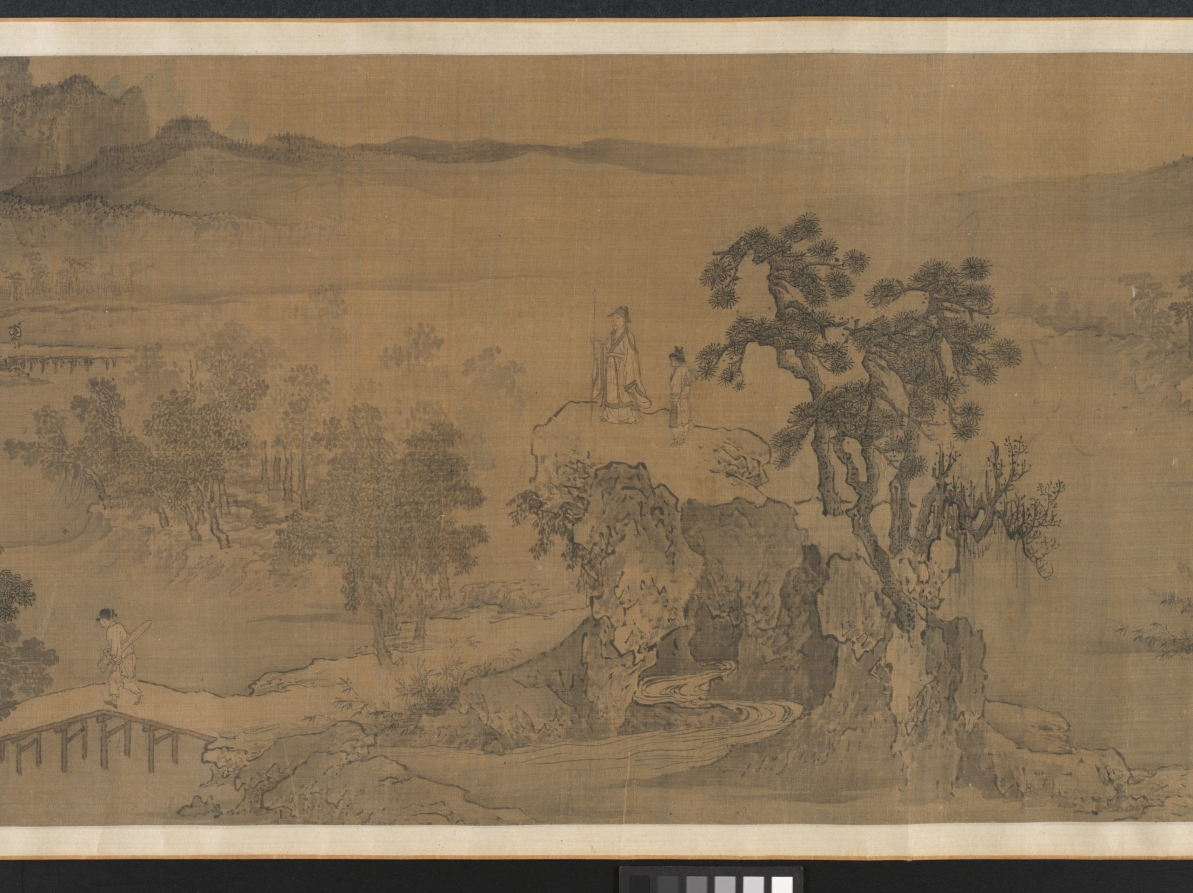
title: Tao Yuanming's Return Home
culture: China, Yuan dynasty (1271-1368)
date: 1300s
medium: Handscroll; ink and slight color on silk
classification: Painting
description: Tao Yuanming's revered poem "Return Home 歸去來辭 (Gui qu lai ci)" powerfully conveys his desire to leave bureaucratic life for the simplicity and authenticity of nature. This sentiment has deeply resonated with generations of Chinese scholars, making it a popular theme in paintings. This handscroll uses continuous narrative depicting Tao in multiple scenes from the poem. Starting on the right, the poet travels to his home. His children wait by the gate, while his wife pauses to tidy her hair before welcoming him. Then, free from the burdens of official service, Tao spends time in both nature and his cottage, where he can again enjoy wine, music, and books.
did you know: Poet Tao Yuanming 陶淵明 (c. 365–427 CE) returned to a secluded life instead of pursuing a civil service career.